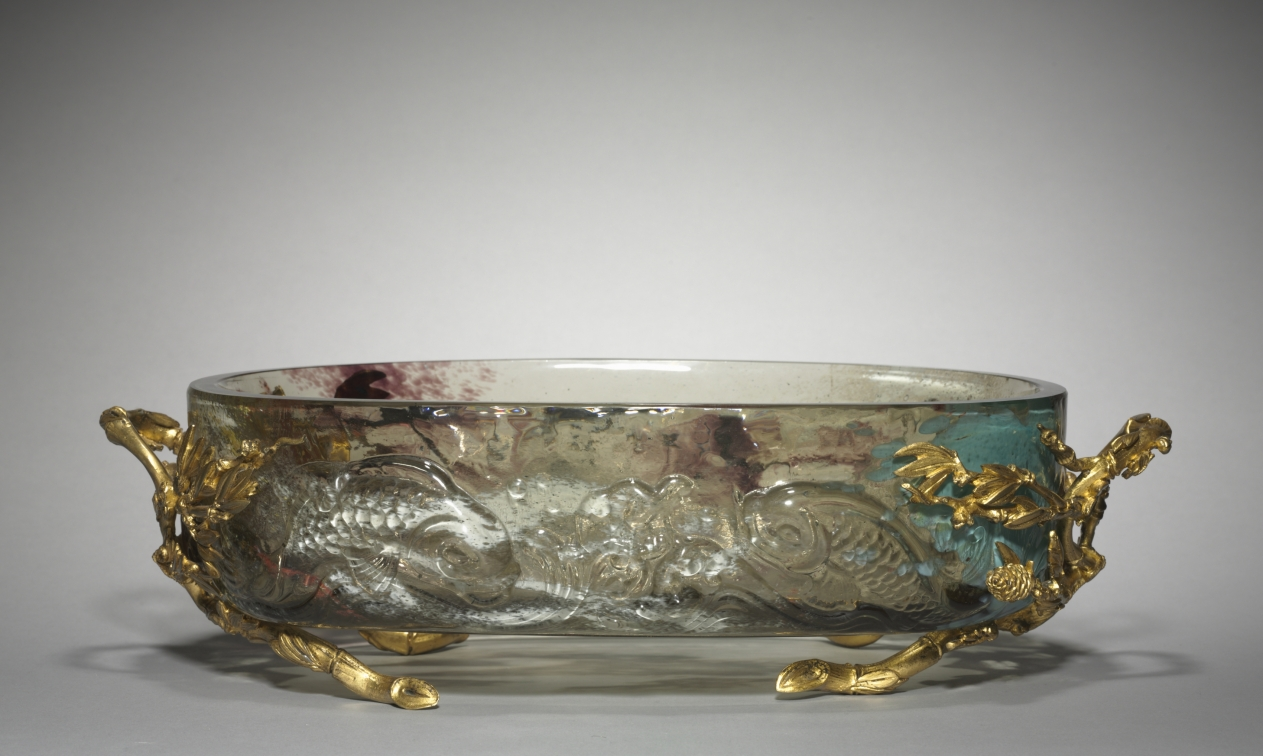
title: Centerpiece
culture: France, Paris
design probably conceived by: Eugène Rousseau (French, 1827–1891)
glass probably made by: firm of Appert Frères (French)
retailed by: firm of Escalier de Cristal (French)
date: c. 1880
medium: glass with gilt metal mounts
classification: Glass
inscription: on underside of glass: Escalier de Cristal. Paris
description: The retail firm of Escalier de Cristal seems not to have directly manufactured the wares they sold, but they exercised design control and sometimes brought together craftspeople of various talents and training to execute their stylish goods. Eugène Rousseau was not himself a craftsman, but he acted as a sort of editor, and glass and ceramics were made under his supervision. The glass of this bowl, with its cast relief decoration and colored inclusions, is of a kind associated with Rousseau. It is known that much of his glass was actually made by the firm of Appert Frères. In terms of style, this Centerpiece reflects the interest in things Japanese, which was an important element in the luxury goods made around 1880. The swimming fish and the naturalistic details of the gilt metal pinecones and twigs tied with string suggest this Asian source of inspiration.